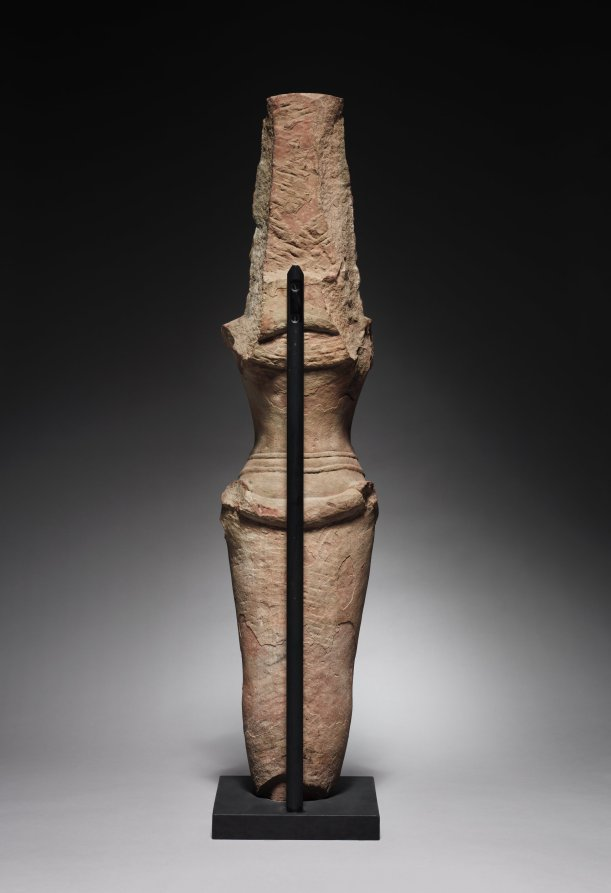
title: Standing Vishnu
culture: Northern India, Mathura, late Gupta Period (320-647)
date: late 500s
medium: red sandstone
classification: Sculpture